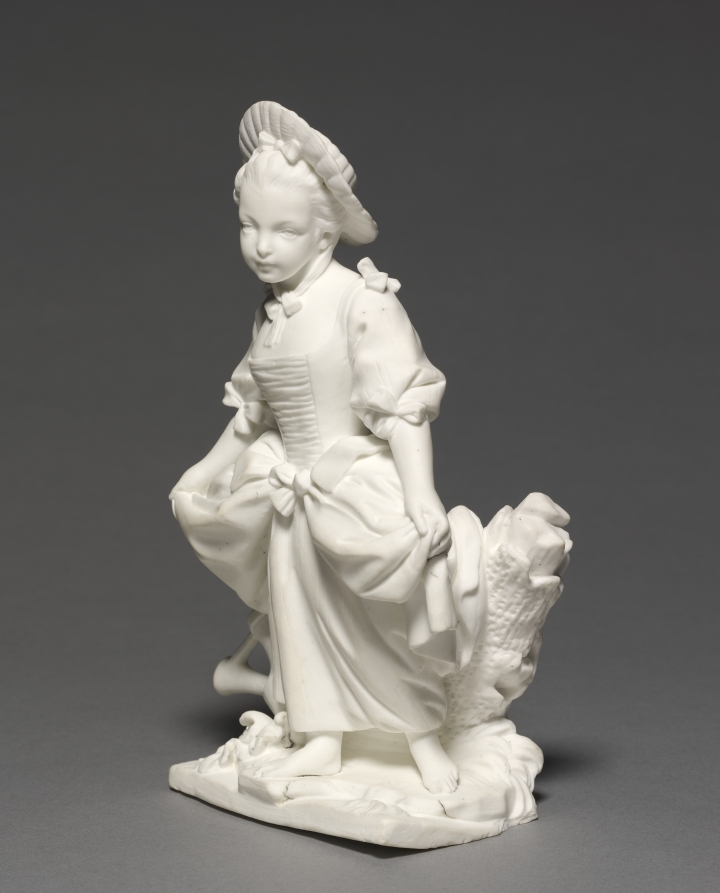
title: Figure of the Dancer (La Danseuse)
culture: France, Vincennes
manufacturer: Vincennes Porcelain Factory (France, 1740–56)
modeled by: Pierre Blondeau (French)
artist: after a design by François Boucher (French, 1703–1770)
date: 1748–52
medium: unglazed soft-paste porcelain (biscuit porcelain)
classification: Ceramic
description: Although a few Vincennes porcelain figures exist which are glazed, the royal factory adopted at an early date the practice of producing unglazed, biscuit figures which, because of the purity of their material, resemble marble figurines. The fashion for biscuit figures first introduced at Vincennes quickly spread through Europe.